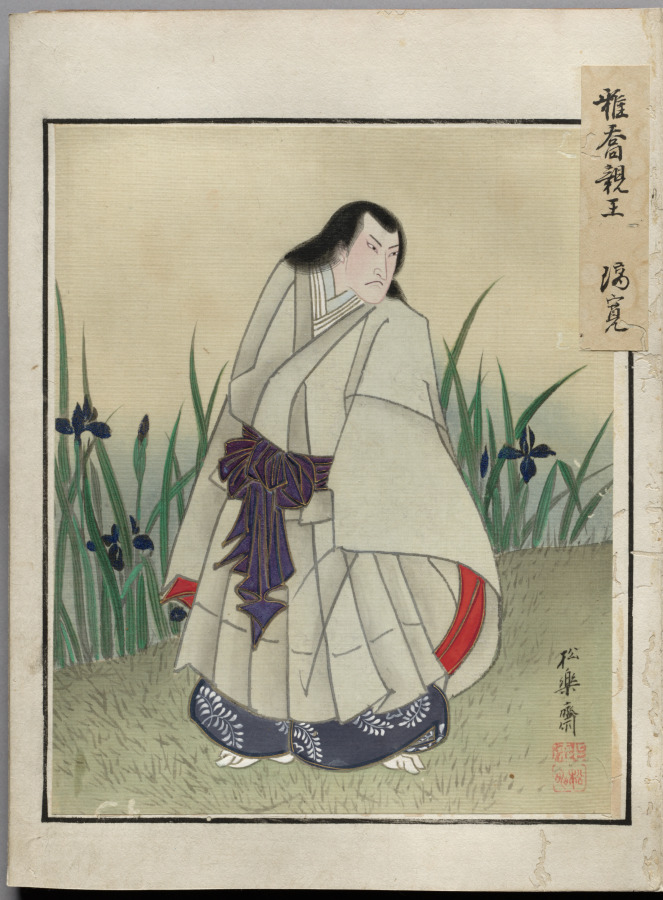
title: Double-Leaf from Album of Actor Portraits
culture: Japan, Edo period (1615–1868)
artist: Shōrakusai (Japanese)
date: c. 1790–1810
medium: double-leaf from an accordion-style album; ink and color on silk (left)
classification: Bound Volume